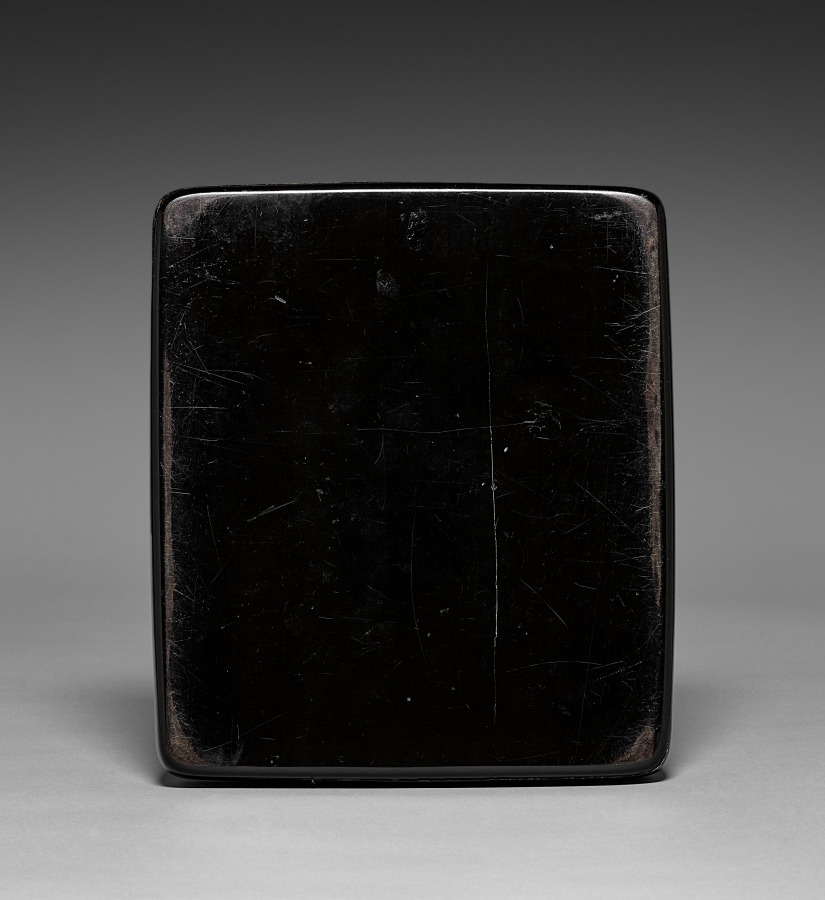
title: Writing Box (Suzuribako) with Europeans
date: 1800s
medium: lacquered wood with gold maki-e, silver inlay, and red lacquer on black ground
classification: Lacquer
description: For many Japanese patrons, objects decorated with images of foreigners offered the rare opportunity to see westerners. The two men on the left were likely Portuguese traders, identifiable by their balloon-shaped pants. The man on the right is a Jesuit priest. Portuguese traders arrived in Japan in 1543 and soon after Christian missionaries began to create outposts there. By the early 17th century, Christianity was outlawed and the Portuguese were forced out of Japan. This object was created during the short period when the Portuguese were allowed in Japan.